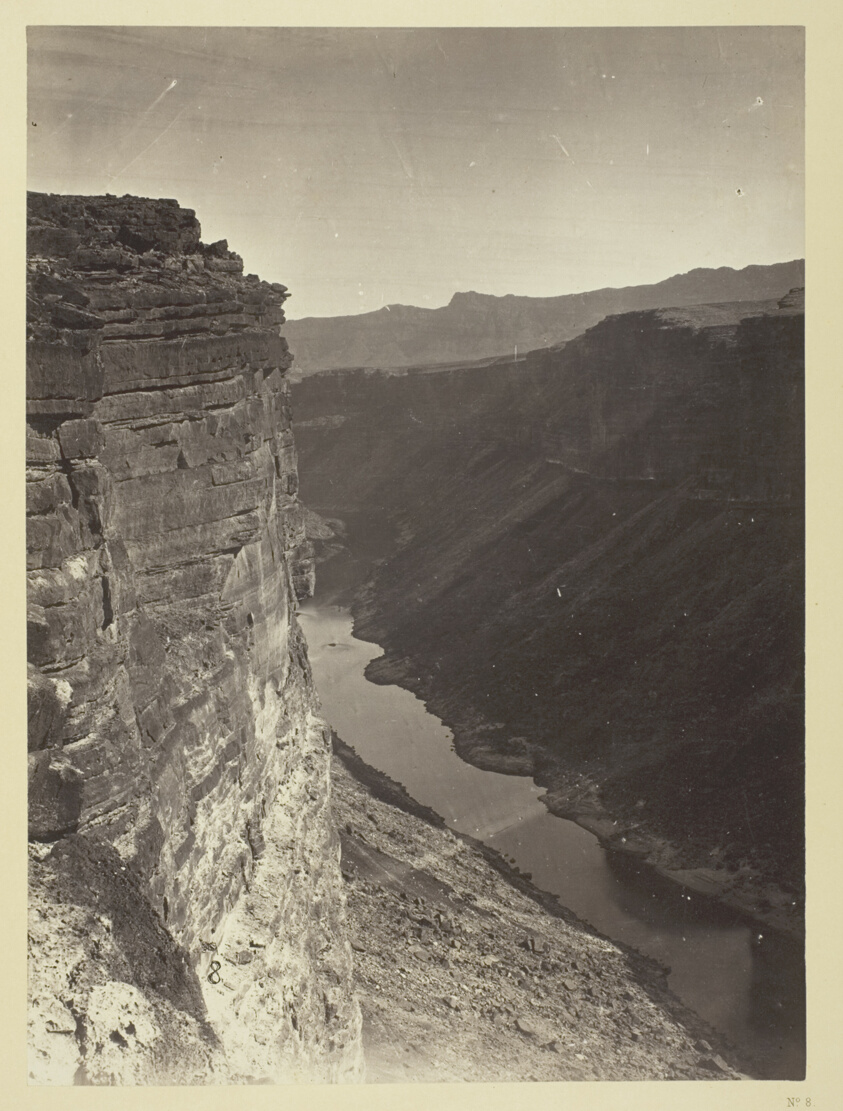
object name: Photograph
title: Grand Cañon, Colorado River, Near Paria Creek, Looking East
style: 19th century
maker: William H. Bell (American, 1830–1910)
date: 1872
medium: Albumen print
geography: United States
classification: albumen print from collodion negative; photograph; photography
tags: Collected by Hugh Edwards